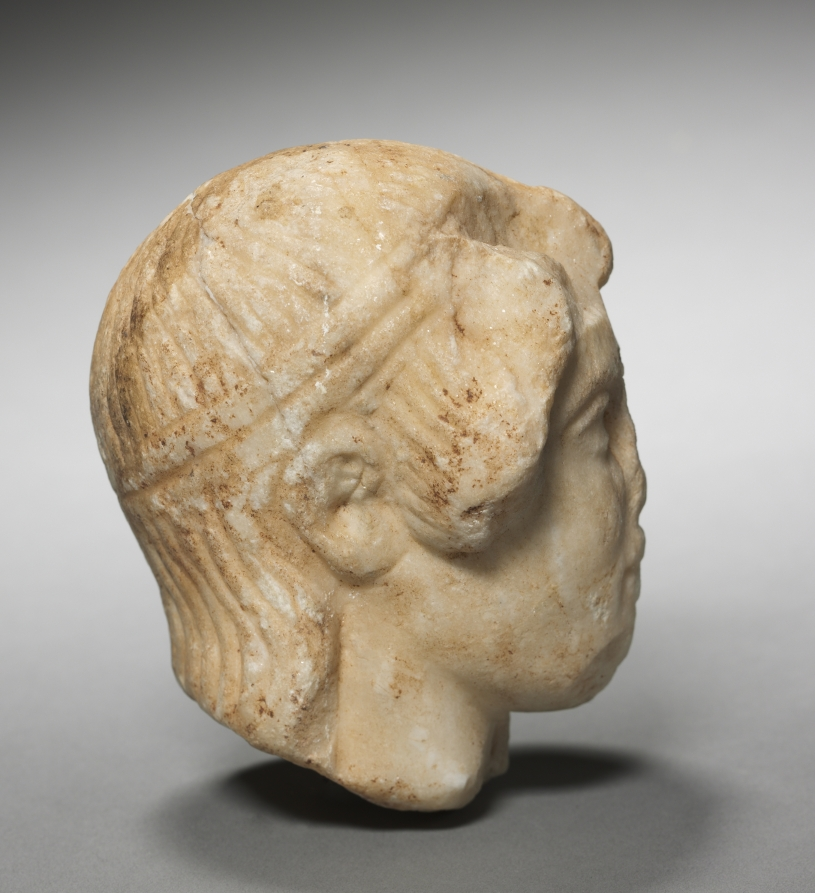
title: Head of a Kore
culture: Greece, Amorgos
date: c. 480–460 BCE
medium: marble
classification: Sculpture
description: This small head probably once belonged to a full-body statuette of a young woman, a miniature of the Archaic Greek kore statue type. She has heavily lidded eyes and wears a double-banded fillet around her hair. The face and front of the hair are damaged and weathered. A statuette such as this one was likely made as a votive gift to a goddess.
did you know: Kore,which means maiden, is also another name for the Greek goddess Persephone.